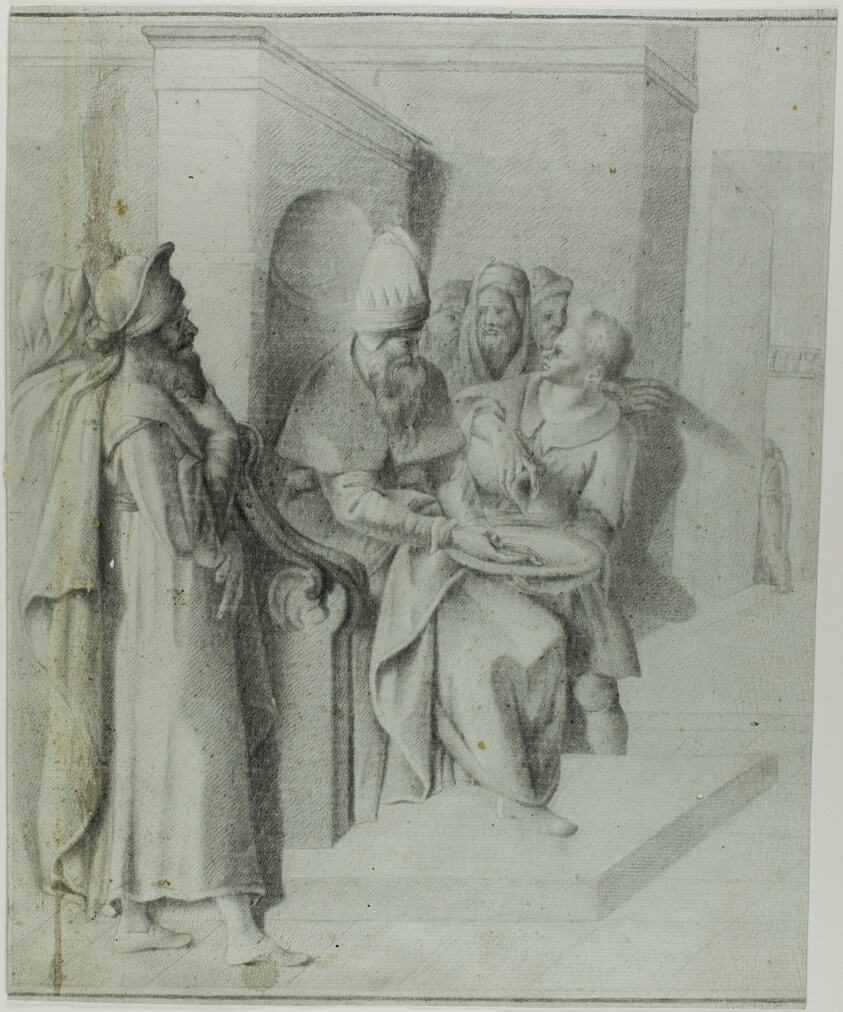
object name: Drawing and Watercolor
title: Pilate Washing his Hands, with Christ Being Led Away: Left Portion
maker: Giovanni da Bologna, after; Italian, 1529-1608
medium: Black chalk on blue laid paper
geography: Italy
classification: chalk; drawings (visual works); prints and drawing